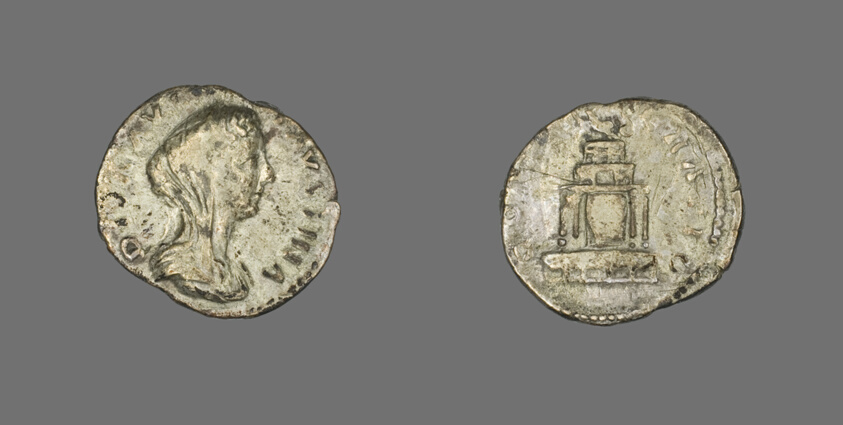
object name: Coin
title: Denarius (Coin) Portraying Empress Faustina the Younger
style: roman (ancient, style or period)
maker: Roman, minted in Rome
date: 176-180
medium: Silver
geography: Roman Empire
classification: coin; ancient art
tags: Chariots